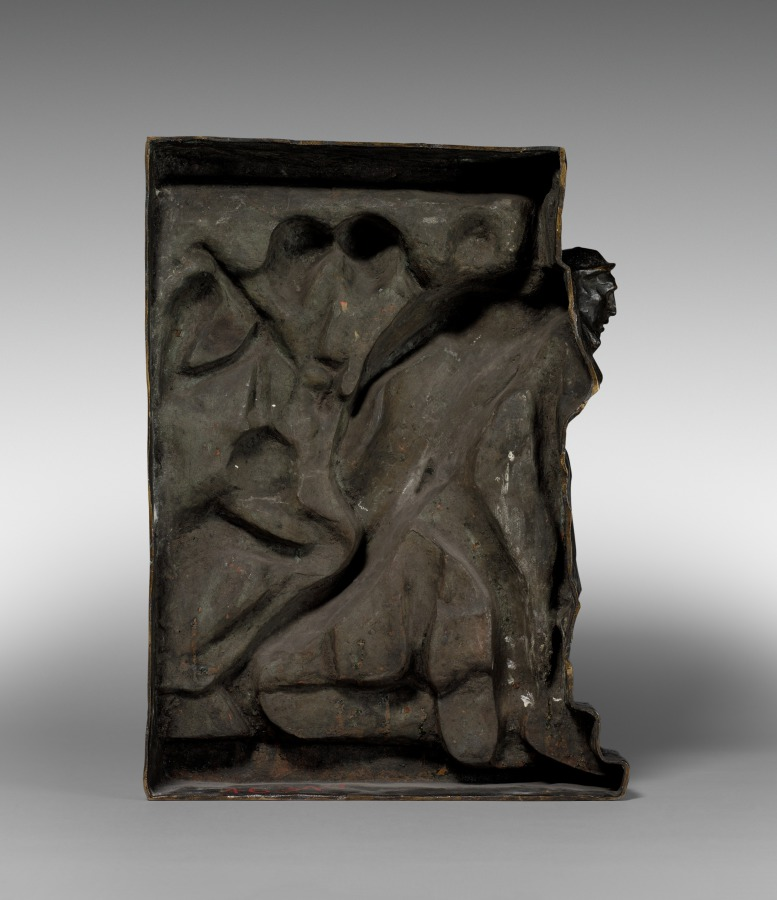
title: The Miners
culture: Belgium, 19th century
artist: Constantin Meunier (Belgian, 1831–1905)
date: c. 1890 – 1900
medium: bronze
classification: Sculpture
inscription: Signed on top: "C. Meunier"; inscribed on right side: "Atelier C. Meunier, 50 Rue (?)"